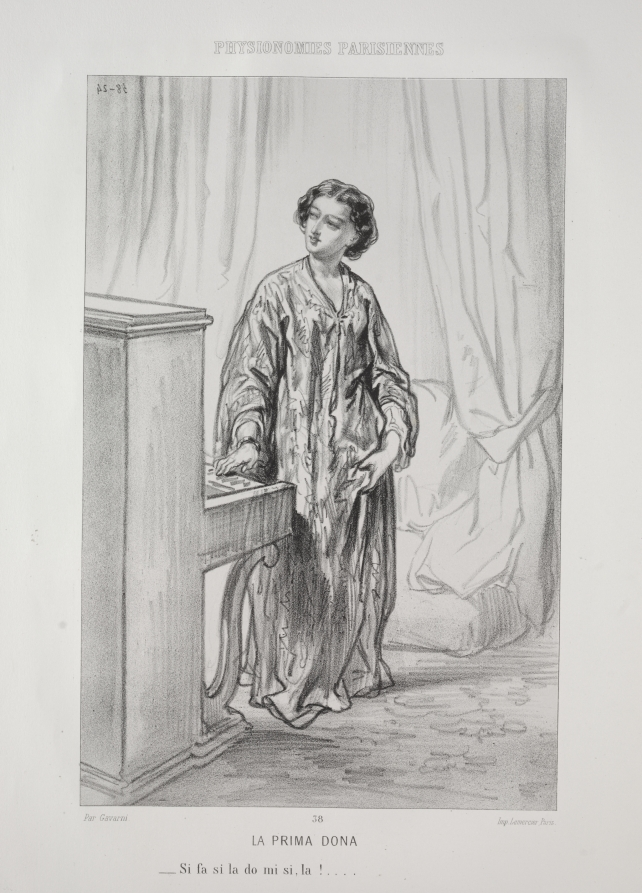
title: La Prima Dona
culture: France, 19th century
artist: Paul Gavarni (French, 1804–1866)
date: c. 1857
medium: lithograph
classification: Print